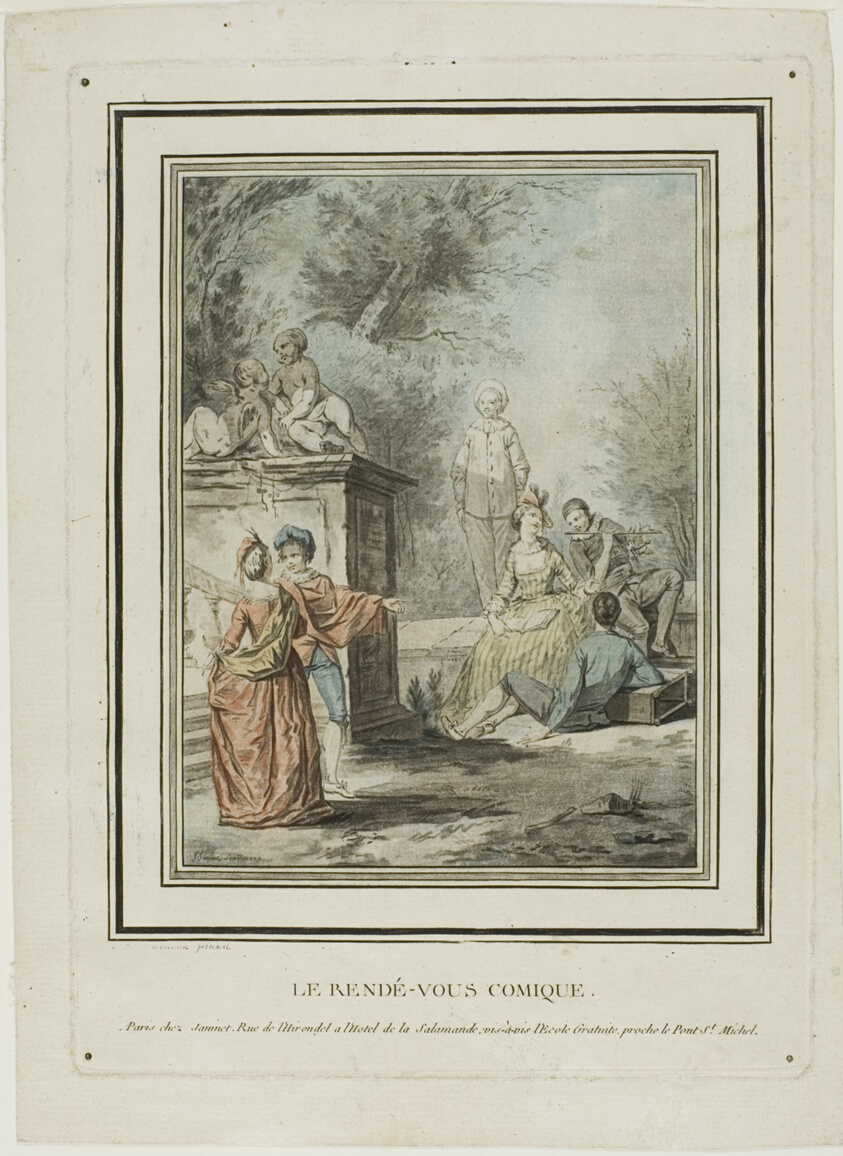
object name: Print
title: The Comic Rendevous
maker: Jean-François Janinet (French, 1752-1814); after Jean Antoine Watteau (French, 1684-1721)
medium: Aquatint on paper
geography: France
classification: aquatint; print; prints and drawing